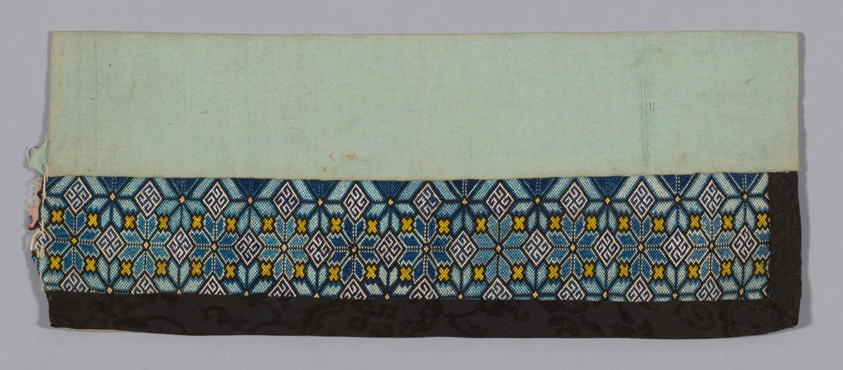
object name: Costume and Accessories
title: Band (from Woman's Trousers)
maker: China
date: 1875/1900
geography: China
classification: costume - needlework; needlework (visual works); costume